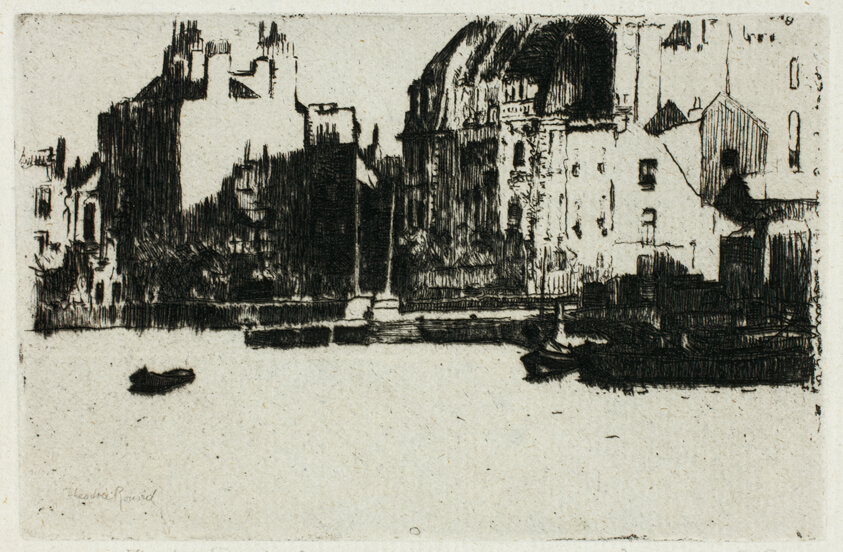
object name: Print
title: Chelsea Palaces (Black and White Version)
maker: Theodore Roussel (French, worked in England, 1847-1926)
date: 1888–89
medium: Etching in black on light gray laid paper, printed over and impressed on a sheet of cream wove paper, now detached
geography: England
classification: etching; paper; print; prints and drawing